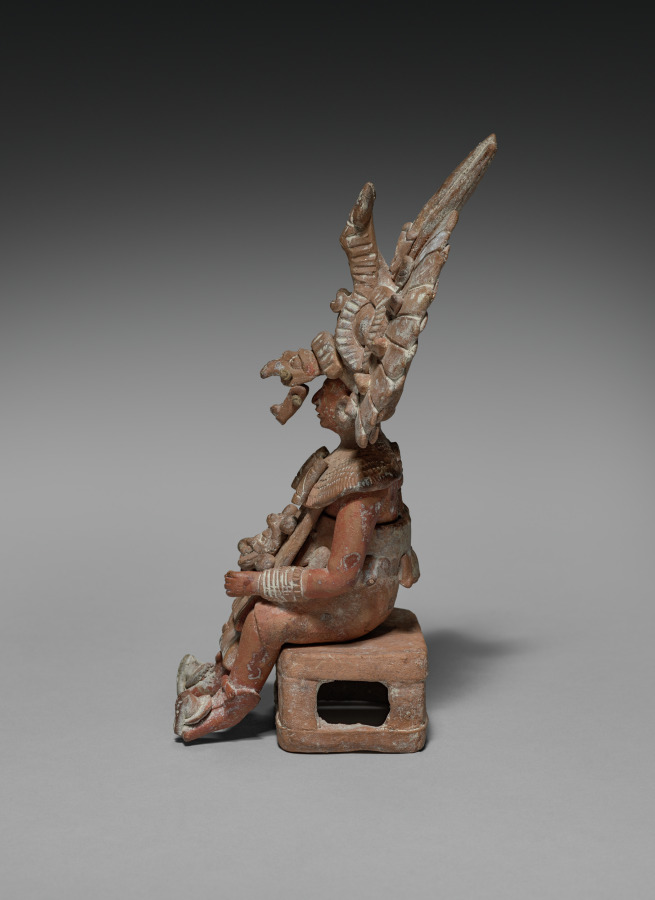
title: Seated Lord with Removable Headdress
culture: Mesoamerica, Maya, probably Jaina Island, Late Classical period, 7th-9th century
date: 600–800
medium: ceramic and slip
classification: Ceramic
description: The major Maya grave offerings on Jaina Island were ceramic figurines that depict deities and humans in a variety of roles. The standing figure represents a warrior who once probably held weapons and wears either quilted cotton armor or the feathered uniform of a military order. The seated figure also represents a male, perhaps another warrior, who wears a huge zoomorphic headdress. A skeletal face with articulated jaw descends from the headdress to fit as a mask over the figure’s face.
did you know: It is estimated that some 20,000 people were buried on the tiny island of Jaina over a 500-year period.